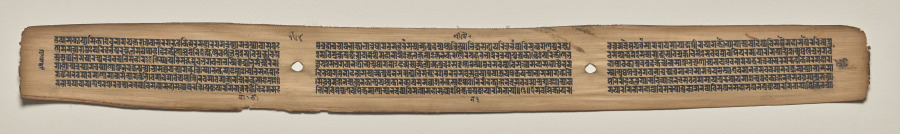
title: Text, folio 164 (verso), from a Manuscript of the Perfection of Wisdom in Eight Thousand Lines (Ashtasahasrika Prajnaparamita-sutra)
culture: Eastern India, Bihar, Vikramashila Monastery. Painting: Nepal, Kathmandu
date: Sunday, September 14, 1119 (year 239 of the Newar Samvat in the month of Ashvina)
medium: gum tempera and ink on palm leaves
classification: Painting